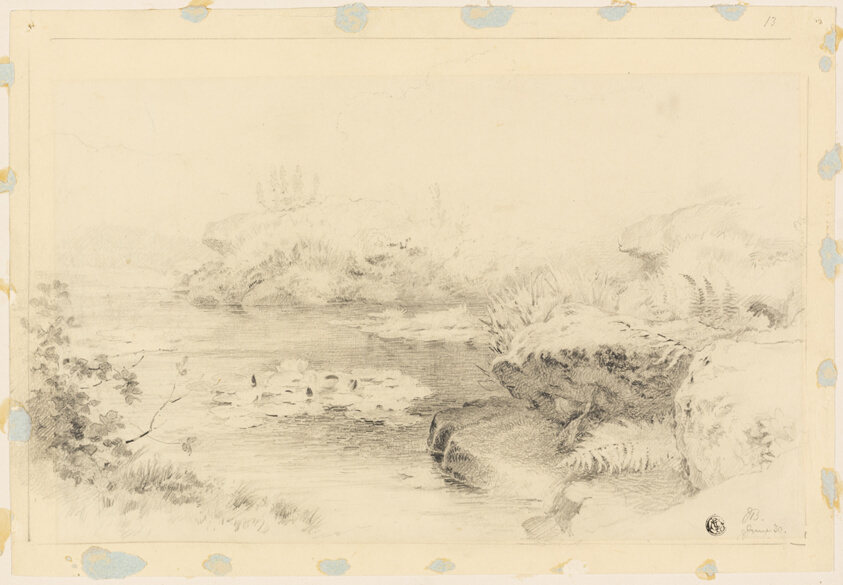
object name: Drawing and Watercolor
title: Pond with Water Lilies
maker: Jabez Bligh (English, 1863-1894)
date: 1883/89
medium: Graphite on cream wove paper, laid down on board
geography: England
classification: graphite; drawings (visual works); prints and drawing